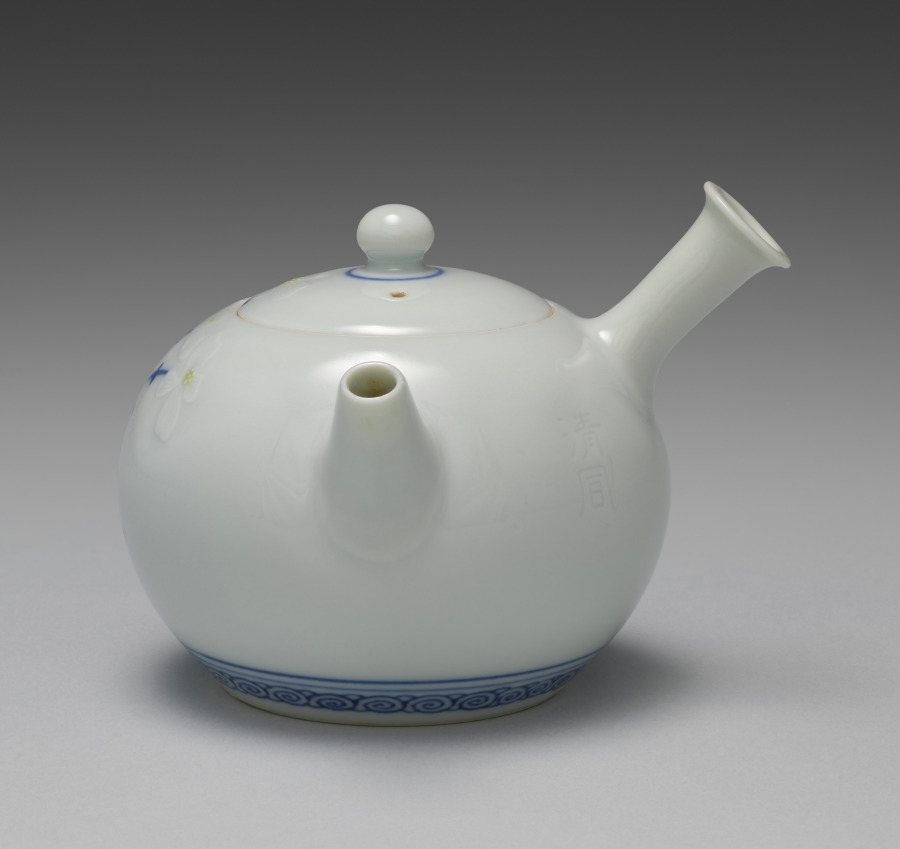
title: Teapot with Begonias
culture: Japan, Meiji period (1868–1912)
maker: Seifū Yohei III (Japanese, 1851–1914)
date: 1897–1914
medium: Porcelain with underglaze and overglaze colors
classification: Ceramic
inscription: 清風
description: This teapot has complex surface treatment: a design of begonias in modulated underglaze blue for the leaves and stems as well as thick overglaze white with incised lines to define the petals, plus small areas of underglaze yellow at their low-relief centers. A band of underglaze blue gives further definition to the lid’s handle, and the area just above the base has a double band of blue above a row of snail-shell curls. Unlike many other teapots, which have marks on their bases, this one has “Seifu” incised into one of its sides in relatively large characters. It is the side that would face the host if the teapot were held by the handle with the right hand, which would be the expectation.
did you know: This teapot with begonias combines underglaze blue with subtle use of yellow and white enamels.